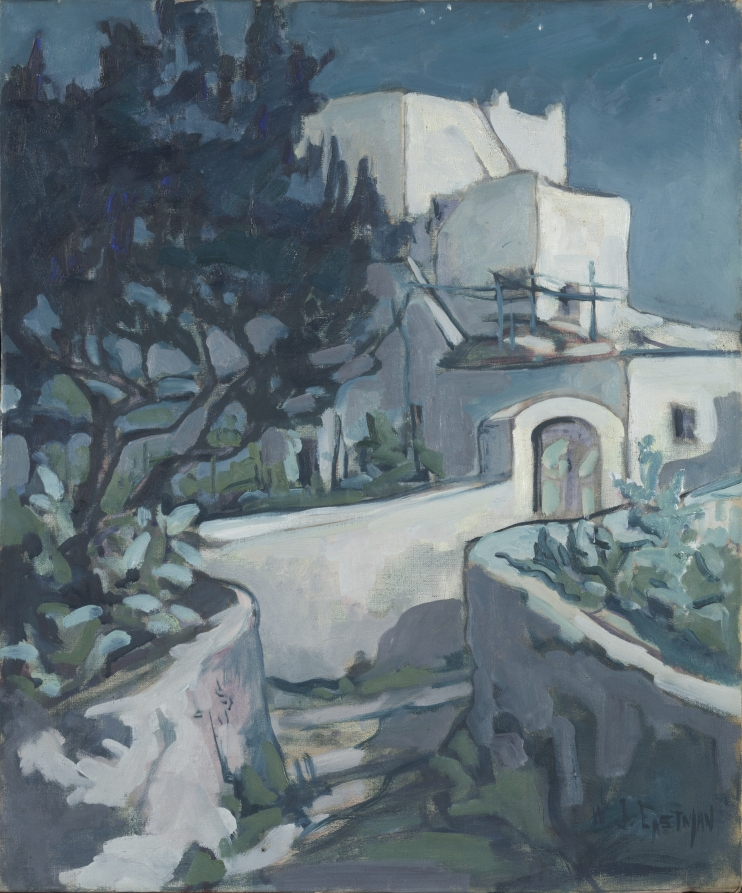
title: Italian Night, Capri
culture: America, Ohio, Cleveland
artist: William Joseph Eastman (American, 1888–1950)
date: 1924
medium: oil on canvas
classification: Painting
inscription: signed lower right: W. J. Eastman.